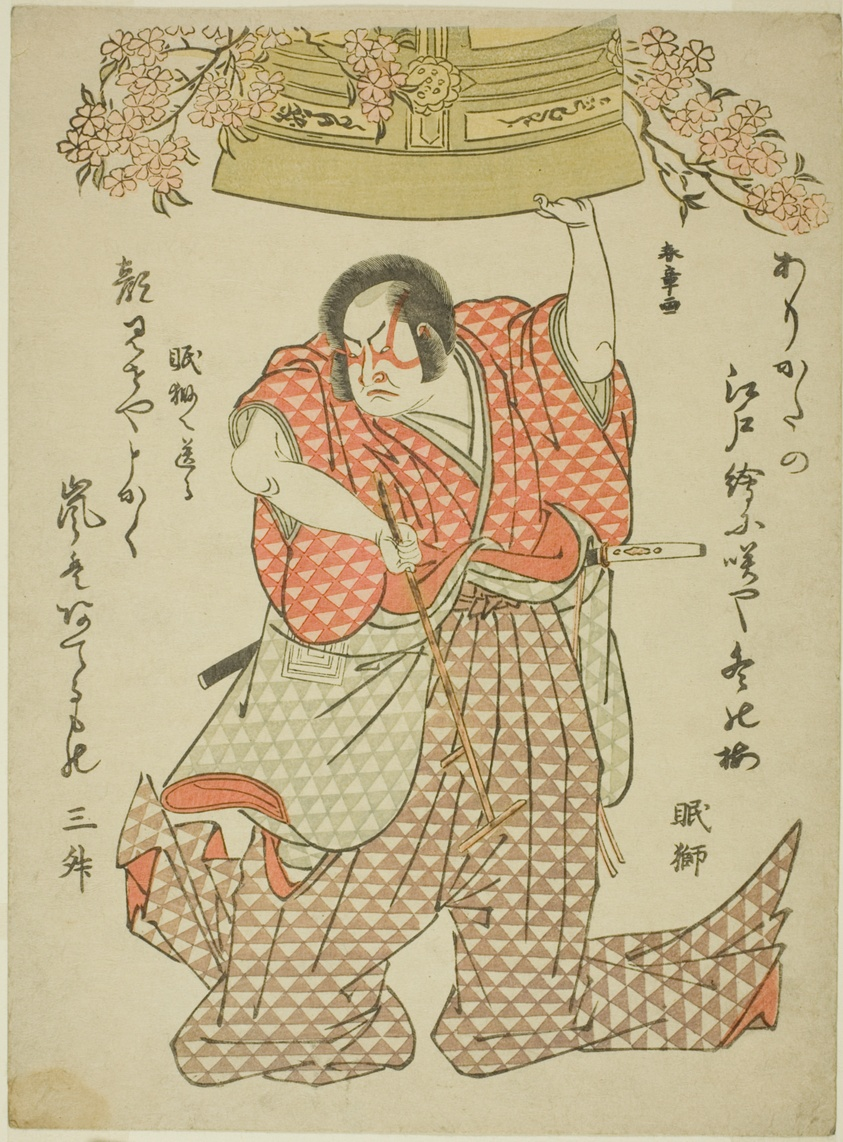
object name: Print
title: The Actor Arashi Hinasuke I as Watanabe Choshichi Tonau in the Play Tokimekuya O-Edo no Hatsuyuki (Thriving Now: The First Snow of Edo), Performed at the Morita Theater from the First Day of the Eleventh Month, 1780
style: Japanese (culture or style)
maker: Katsukawa Shunsho 勝川 春章; Japanese, 1726-1792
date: c. 1780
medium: Color woodblock print; chuban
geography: Japan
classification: woodblock print; print; asian art